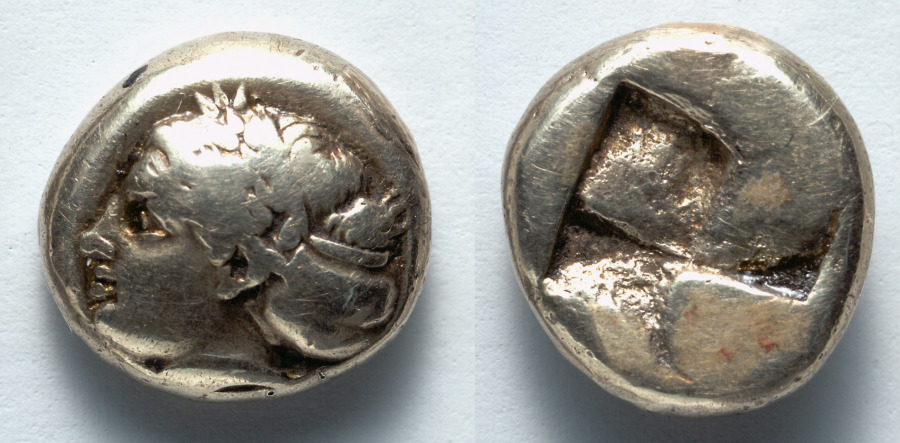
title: Hecte: Female Head (obverse); Incuse Square (reverse)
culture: Greek, minted at Phokaia (Ionia)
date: 600–350 BCE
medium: electrum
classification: Coins